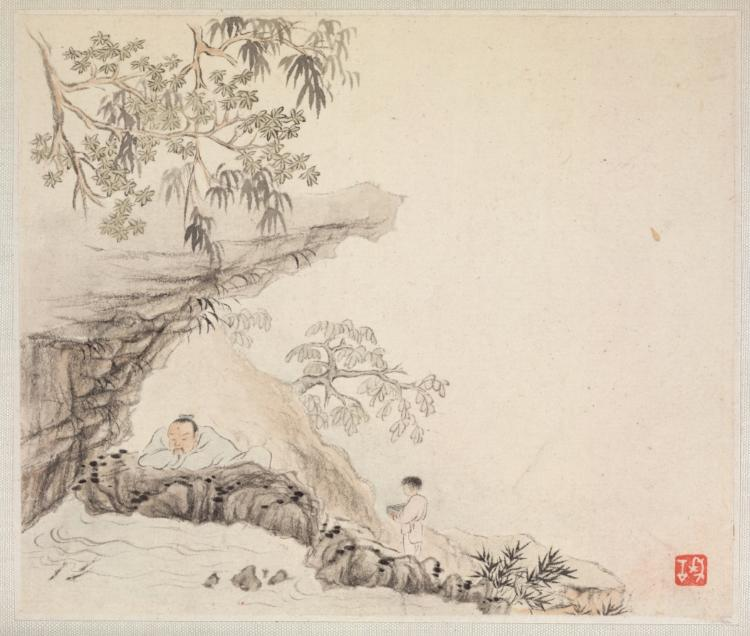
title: Album of Landscape Paintings Illustrating Old Poems: Scholar watching Fish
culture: China, Qing dynasty (1644-1911)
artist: Hua Yan (Chinese, 1682–c. 1765)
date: 1745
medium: album leaf, ink and light color on paper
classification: Painting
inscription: Seal lower right corner